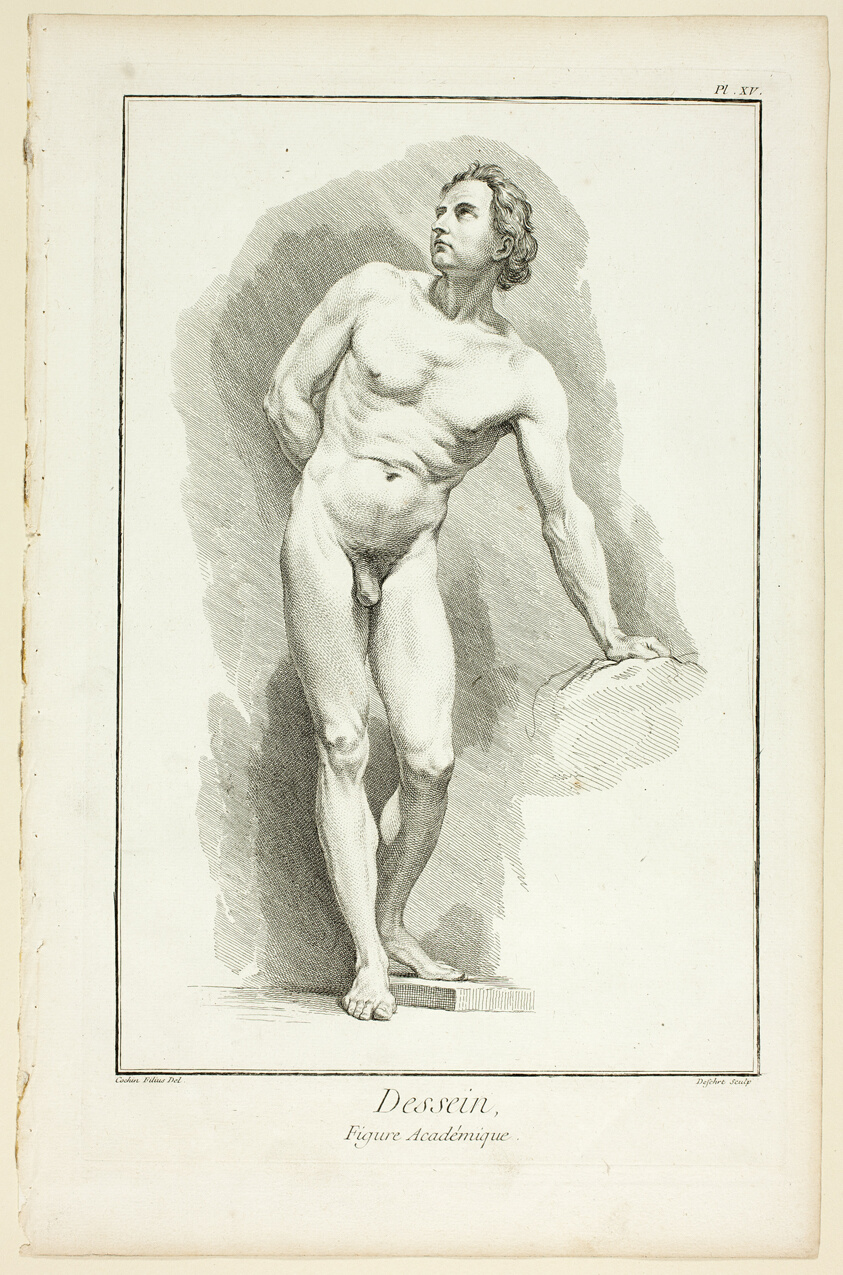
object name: Print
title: Design: Academic Figure, from Encyclopédie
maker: A. J. Defehrt (French, active 18th century); after Charles-Nicholas Cochin, the younger (French, 1715-1790); published by André le Breton (French, 1708-1779), Michel-Antoine David (French, c. 1707-1769), Laurent Durand (French, 1712-1763), and Antoine-Claude Briasson (French, 1700-1775)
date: 1762/77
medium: Etching, with engraving, on cream laid paper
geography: France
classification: etching; print; prints and drawing